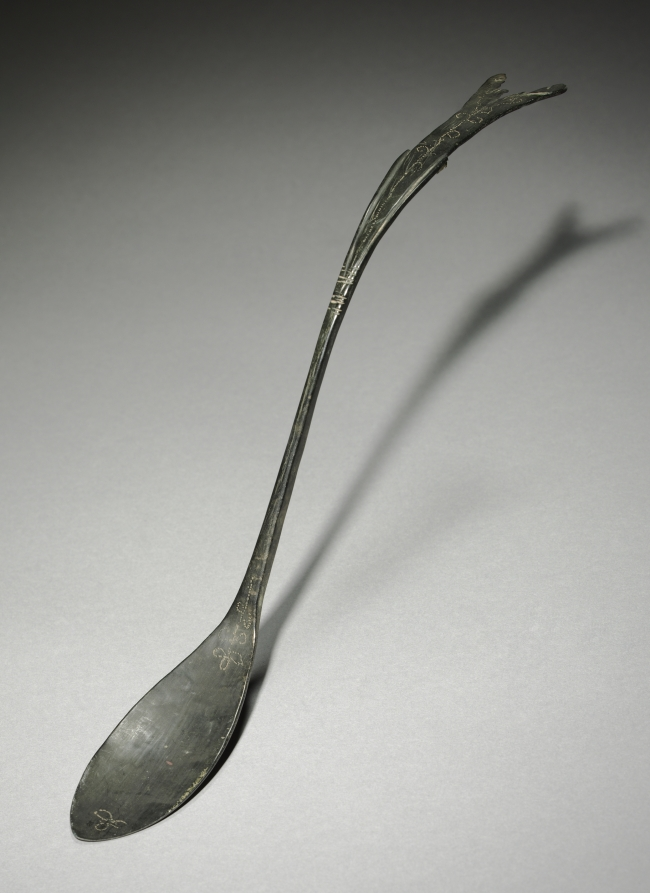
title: Spoon with Fish-Tail Design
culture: Korea, Goryeo dynasty (918–1392)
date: 918–1392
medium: bronze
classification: Metalwork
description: Many of Goryeo period spoons like this one feature a curved handle that splits into a jagged fishtail design. This fishtail design is not unique to Korea; it was also widely used in the area under the rule of two non-Han Chinese states: Liao (907–1125) and Jin (1115–1234). These seemingly ordinary objects testify to exciting material interactions between the Goryeo dynasty and non-Han Chinese northern states, which were often omitted from the official records.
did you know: Bronze spoons are the most common burial item. Scholars have proposed that toward the end of the 14th century, Koreans enjoyed meat-based soups more than any other dishes, explaining why spoons became common household items as well as burial goods.